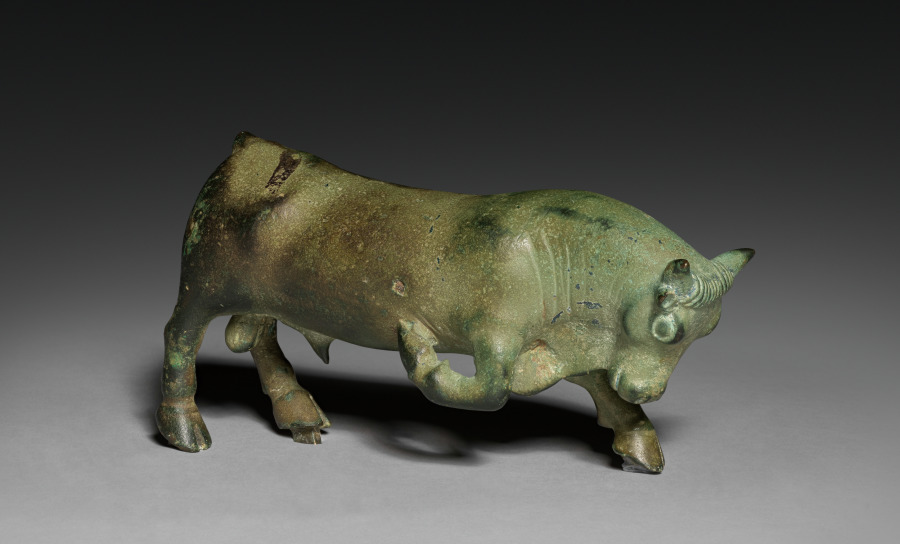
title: Pawing Bull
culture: South Italy, Lucania, Greek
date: 500–475 BCE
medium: bronze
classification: Sculpture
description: With its head slightly lowered and right foreleg raised in a pawing motion, this robust bull seems poised for action. The pose closely resembles that of bulls on coins minted at Thurii, a Greek colony in South Italy, but the statuette seems earlier in date and could have other associations. Perhaps the bull once carried the princess Europa, for example, or battled a lion or a hero. Alternatively, it may have stood alone as a small-scale offering, representing the actual bulls sometimes sacrificed to deities.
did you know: This solid-cast bronze bull is nearly intact, missing only its tail.